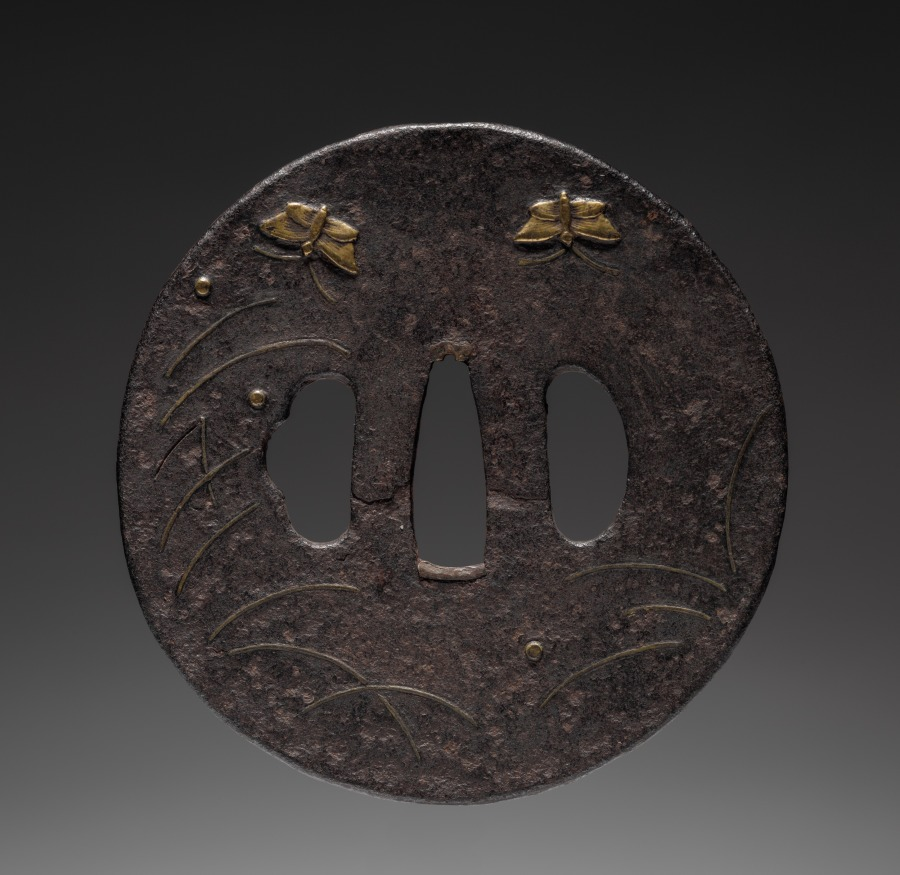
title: Sword Guard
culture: Japan, Edo period (1615–1868)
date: 1615–1868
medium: iron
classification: Arms and Armor